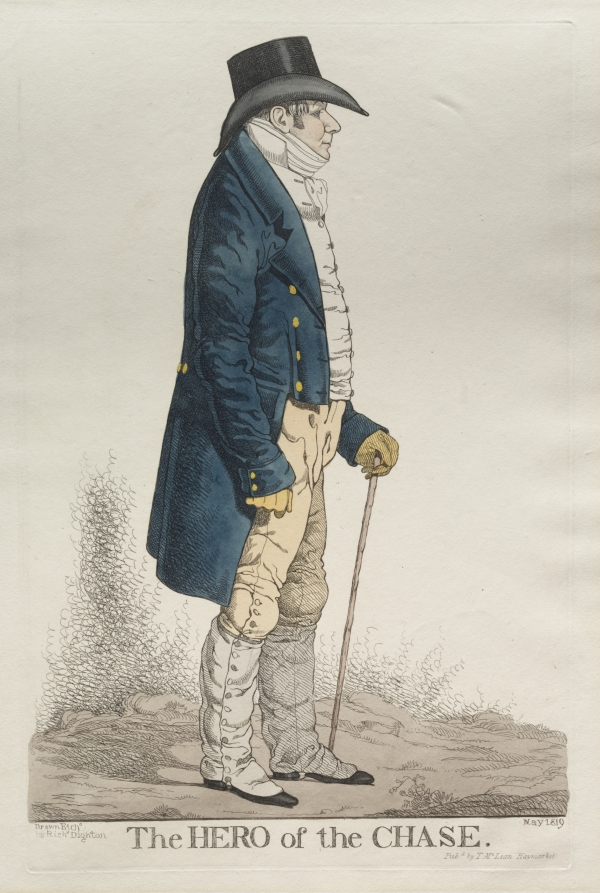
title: The Hero of the Chase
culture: England, 19th century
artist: Richard Dighton (British, 1795–1880)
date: 1819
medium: etching, hand colored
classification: Print